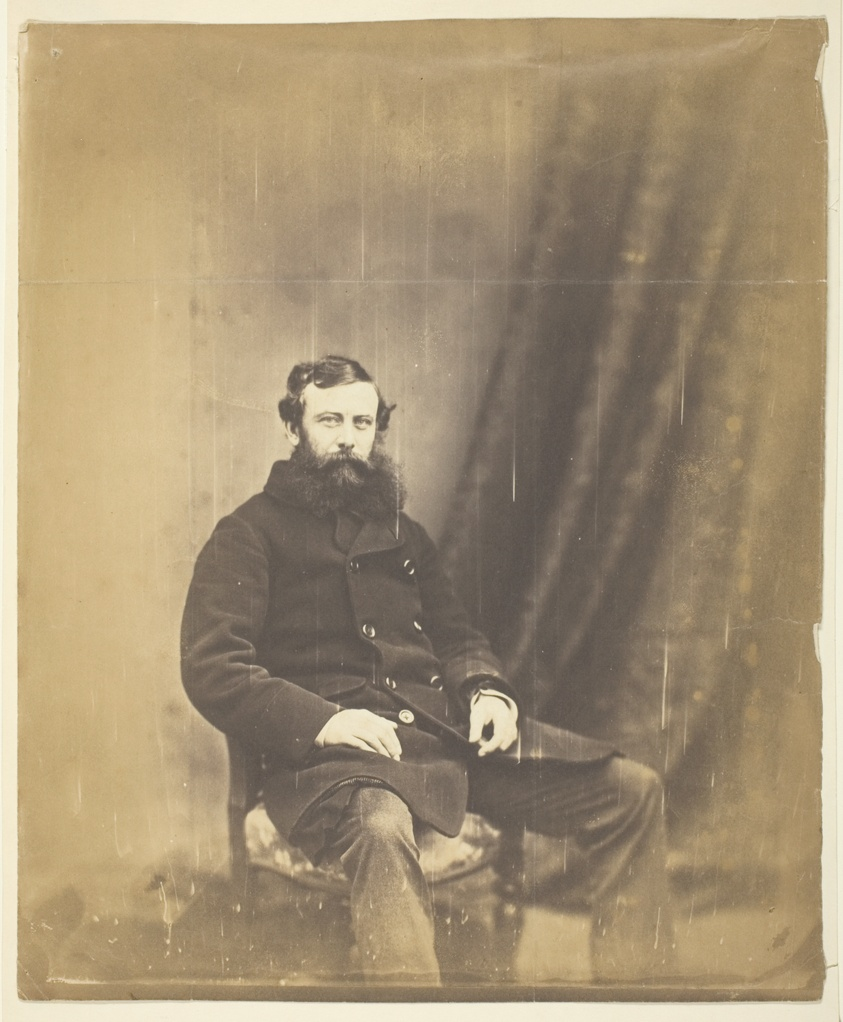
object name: Photograph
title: Colonel Simmons, attaché to Omar Pacha, The Crimea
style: 19th century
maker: Roger Fenton (English, 1819–1869)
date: 1855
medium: Thinly albumenized print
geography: England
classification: albumen silver print; photographic process; photography; photograph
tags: Collected by Hugh Edwards